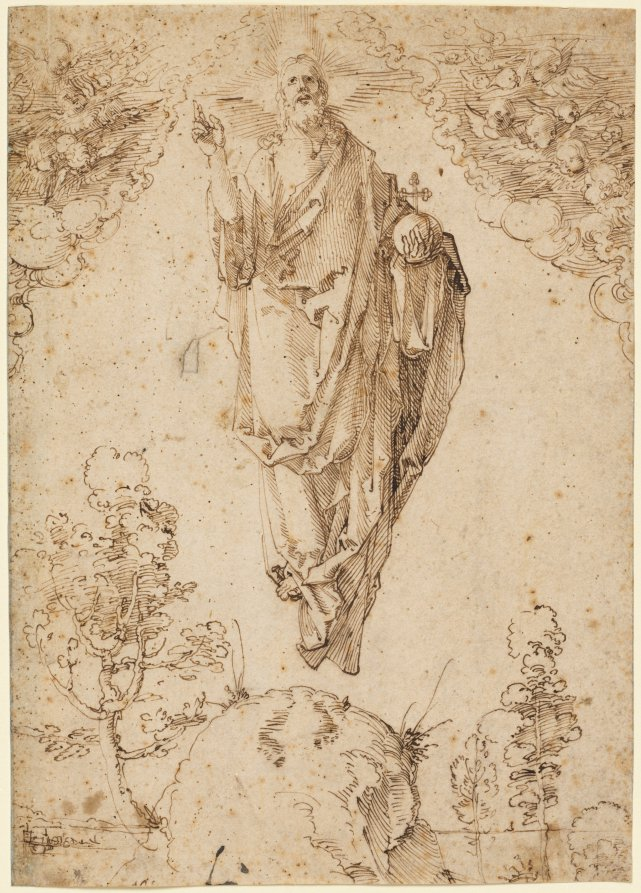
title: Ascension of Christ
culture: Germany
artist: Albrecht Dürer (German, 1471–1528)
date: c. 1515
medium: pen and brown ink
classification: Drawing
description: Forty days after his Resurrection, Christ made his final appearance to his apostles. The story of the Ascension (Acts 1:9-12) tells that Christ's apostles were standing with him on the Mount of Olives when he was lifted up and taken to heaven in a cloud. Dürer depicted Christ with the traditional signs of his role as world saviour-making a gesture of blessing with his right hand and holding a cross-topped globe in his left. The artist included cherubs in the cloud, along with Christ's footprints, which, according to later tradition, were preserved on the Mount of Olives.